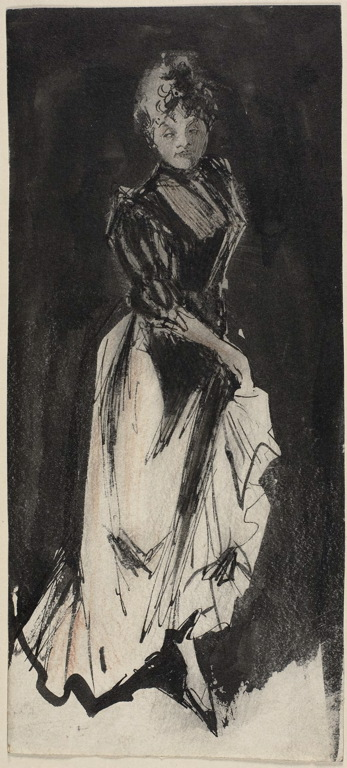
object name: Drawing and Watercolor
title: Woman Lifting Skirt to Walk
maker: Georges Alfred Bottini (French, 1874-1907)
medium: Pen and black ink, with brush and black wash, over red chalk, on ivory wove paper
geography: France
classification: pen and ink drawings; drawings (visual works); prints and drawing